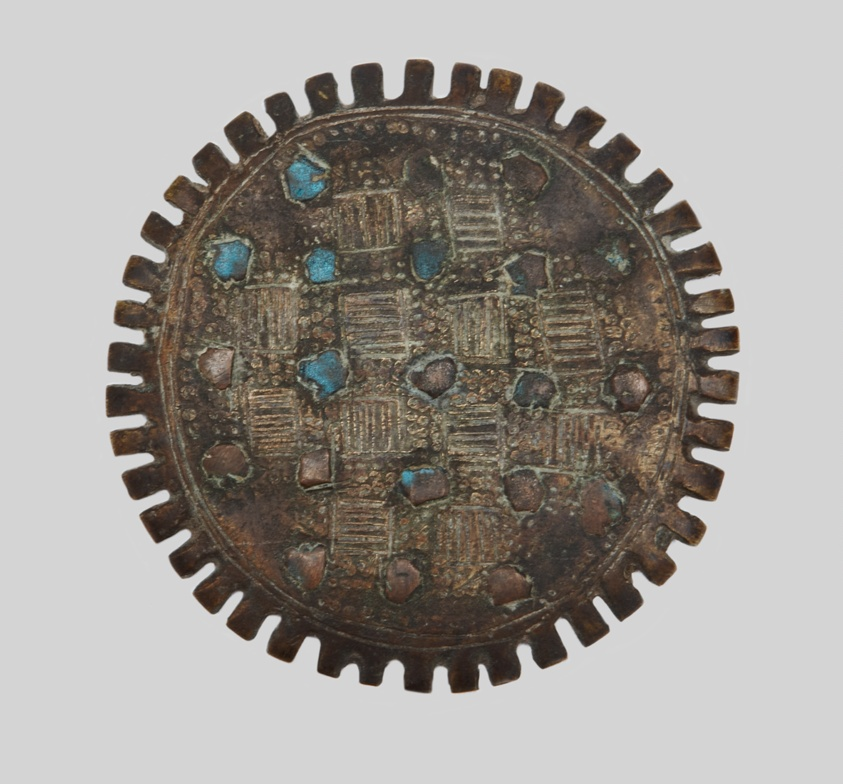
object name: Decorative Arts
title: Goldweight Depicting a Geometric Shape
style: asante, Arts of Africa, akan, african Art, Coastal West Africa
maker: Asante or related Akan-speaking peoples; Ghana; Coastal West Africa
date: 17th/18th century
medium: Copper alloy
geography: Ghana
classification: gold-weight; copper alloy; arts of Africa; african art; miniature; decorative arts